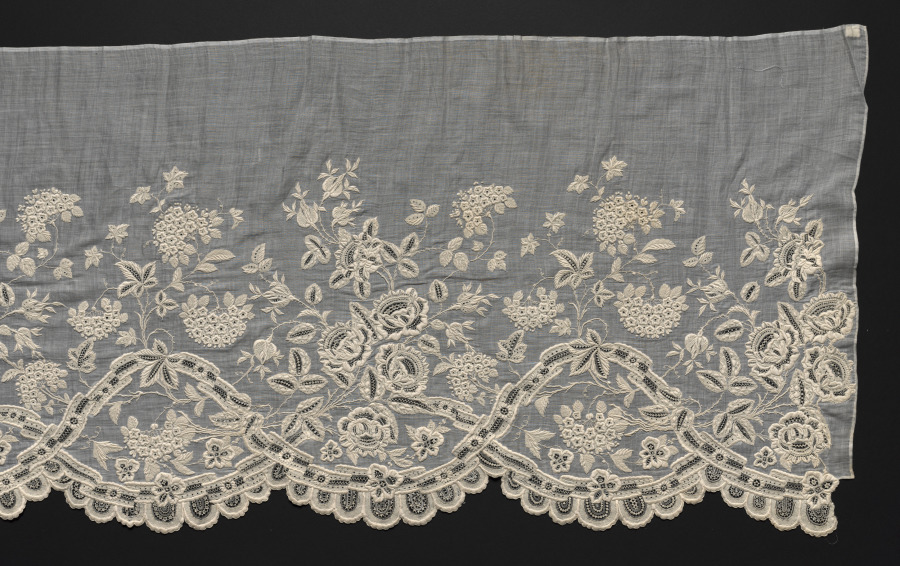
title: Flounce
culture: France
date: 1800–1820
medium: Plain weave cotton: embroidered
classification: Embroidery